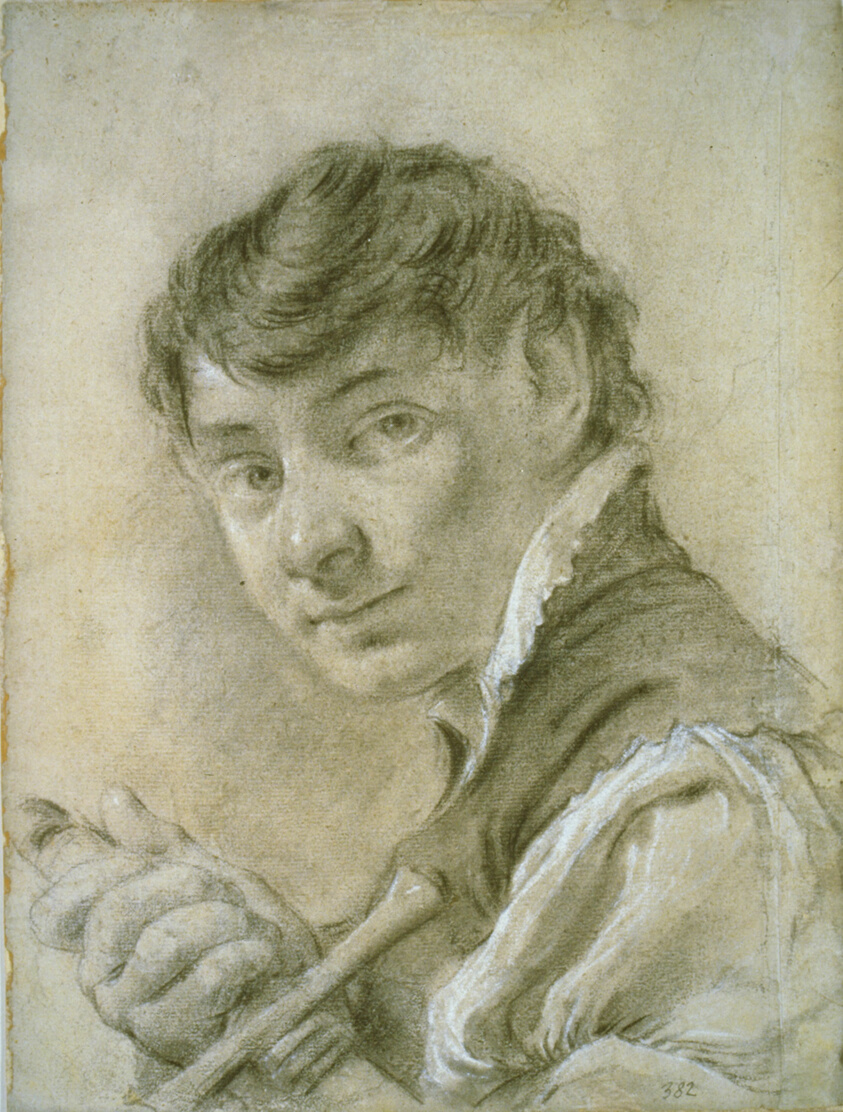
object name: Drawing and Watercolor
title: Portrait of a Young Man Holding a Sword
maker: Giovanni Battista Piazzetta (Italian, 1682-1754)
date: c. 1735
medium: Black chalk with stumping, with traces of charcoal, heightened with touches of white chalk, on blue-gray laid paper, discolored to cream, laid down on cream wood pulp board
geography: Italy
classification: chalk; drawings (visual works); prints and drawing